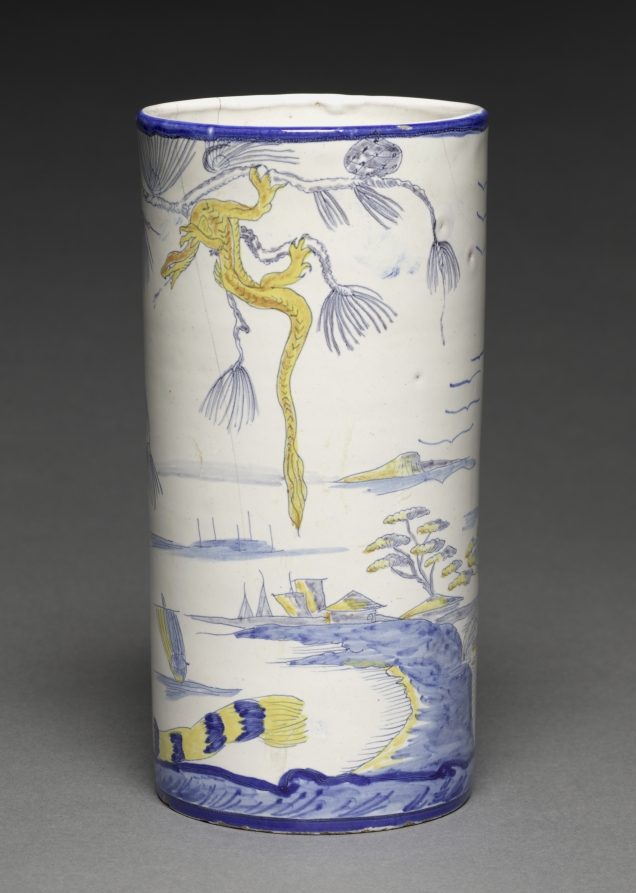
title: Vase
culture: France, 19th century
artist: Emile Gallé (French, 1846–1904)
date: c. 1885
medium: earthenware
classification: Ceramic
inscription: inscribed on tree trunk: "E Galle/Nancy."